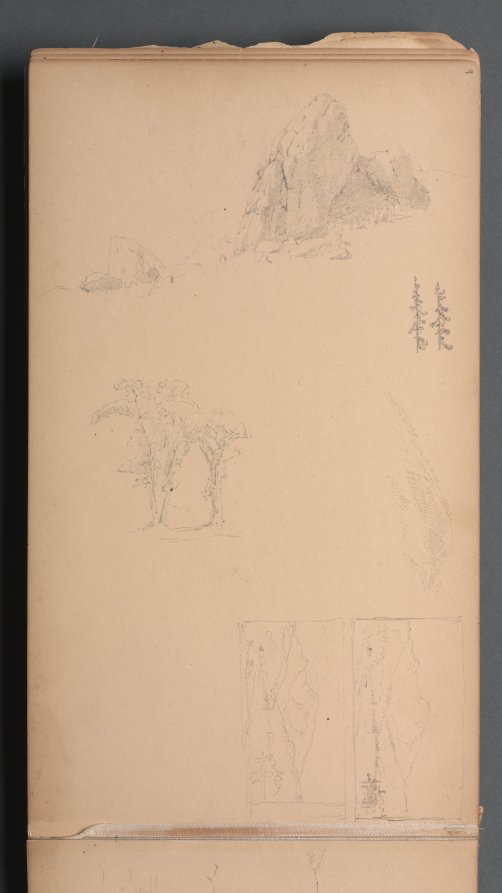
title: Sketchbook, page 09: Mountians and Rocks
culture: America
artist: Sanford Robinson Gifford (American, 1823–1880)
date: 1859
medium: graphite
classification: Bound Volume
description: Gifford was an American landscape painter belonging to the second generation of Hudson River school artists. Based in New York City with a studio at the Tenth Street Studio Building, Gifford took annual summer trips to the Catskills, the Adirondacks, and other scenic locations in New England. This sketchbook accompanied the artist on his expedition in 1859 to New Hampshire and Maine, where he drew sites such as Dixville Notch, the White Mountains, and Peaks Island, Casco Bay. Gifford used such graphite studies as the basis for oil paintings worked up in his studio, such as A Home in the Wilderness (1866).